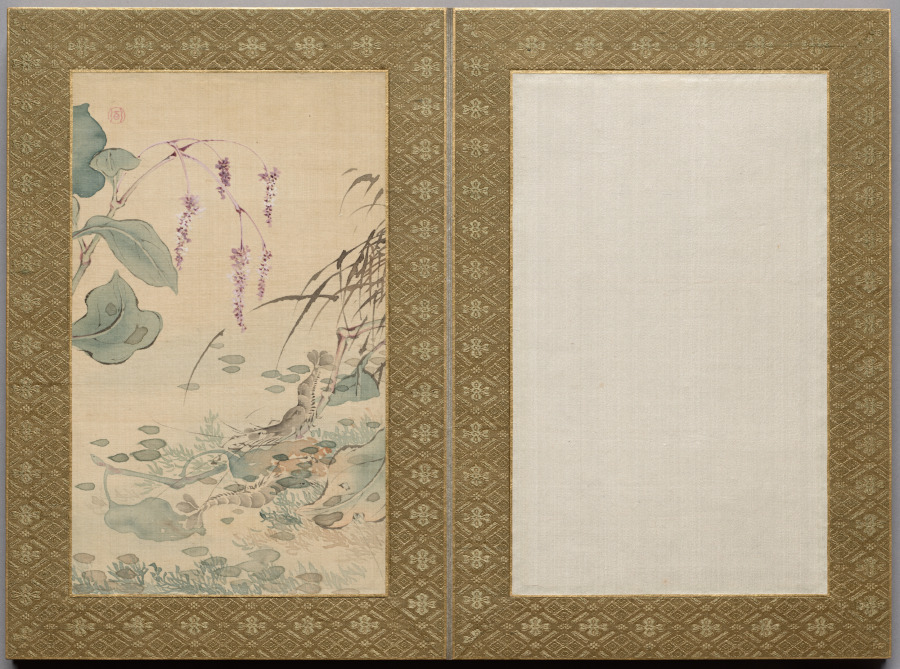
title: Painting from Flowers and Grasses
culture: Japan, Edo period (1615–1868)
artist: Tsubaki Chinzan (Japanese, 1801–1854)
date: 1841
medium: album; ink and color on silk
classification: Painting